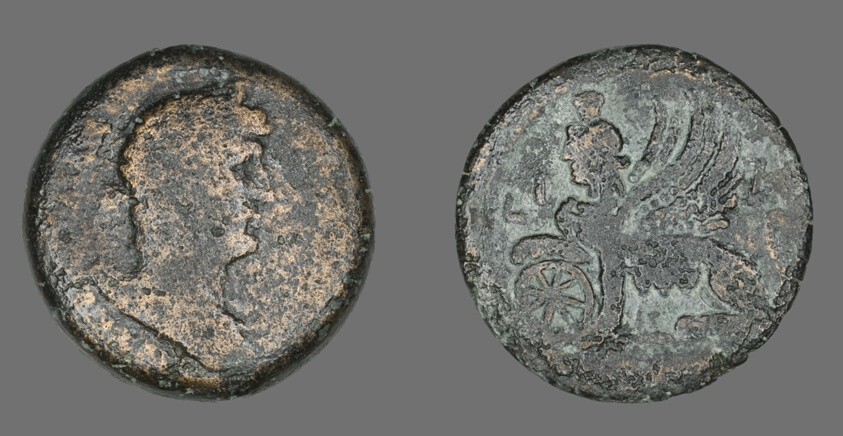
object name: Coin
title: Coin Portraying Emperor Hadrian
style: parthian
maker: Roman, minted in Alexandria, Egypt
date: 133-134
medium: Bronze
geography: Khorasan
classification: coin; ancient art